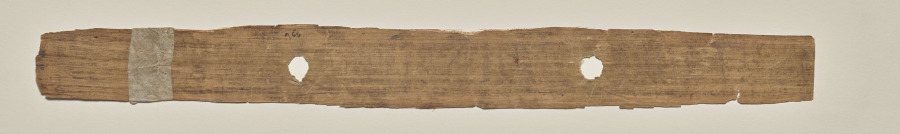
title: Blank leaf, folio 188 (verso), from a Manuscript of the Perfection of Wisdom in Eight Thousand Lines (Ashtasahasrika Prajnaparamita-sutra)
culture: Eastern India, Bihar, Vikramashila Monastery. Painting: Nepal, Kathmandu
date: Sunday, September 14, 1119 (year 239 of the Newar Samvat in the month of Ashvina)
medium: gum tempera and ink on palm leaves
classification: Painting